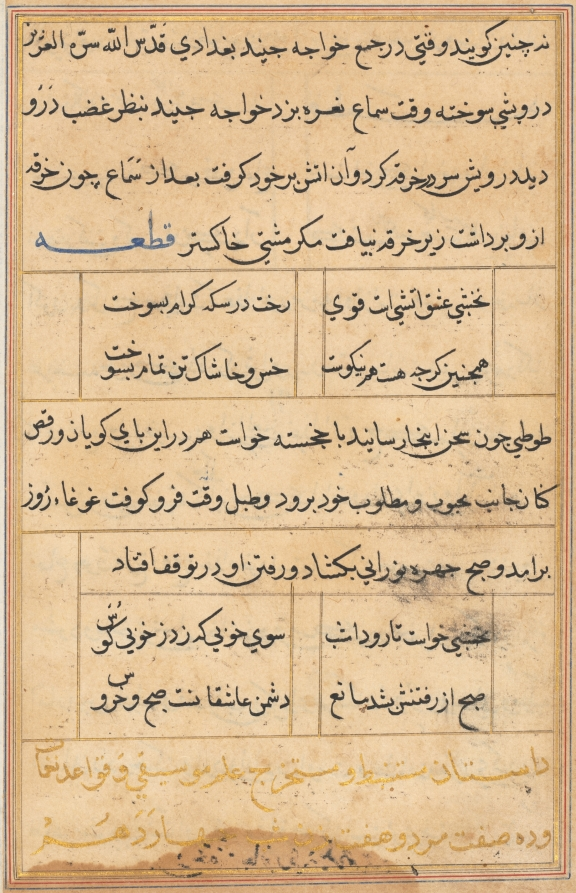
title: Page from Tales of a Parrot (Tuti-nama): text page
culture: Mughal India, court of Akbar (reigned 1556–1605)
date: c. 1560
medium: gum tempera, ink, and gold on paper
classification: Painting